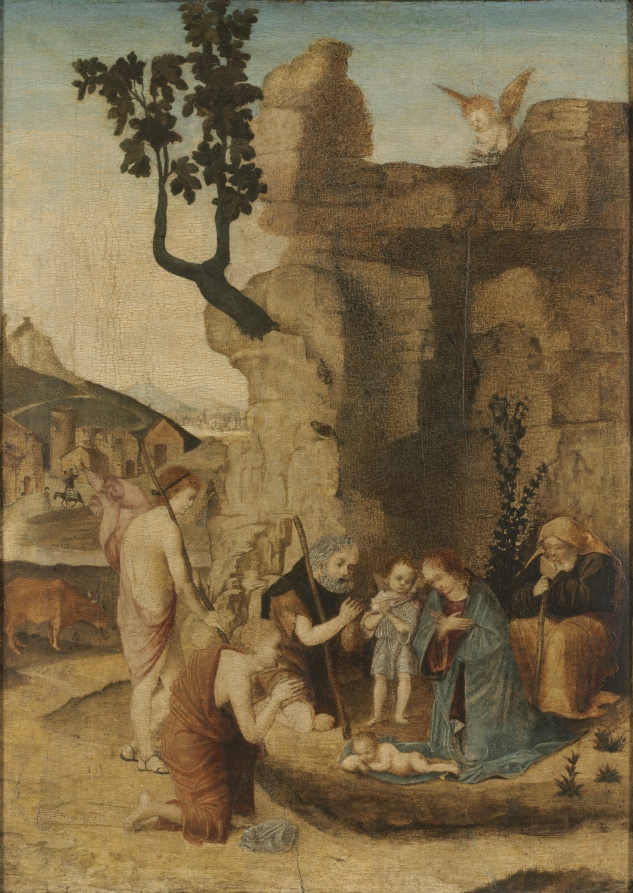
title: Adoration of the Shepherds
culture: Northern Italy, late 15th-early 16th Century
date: c. 1500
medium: oil on wood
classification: Painting